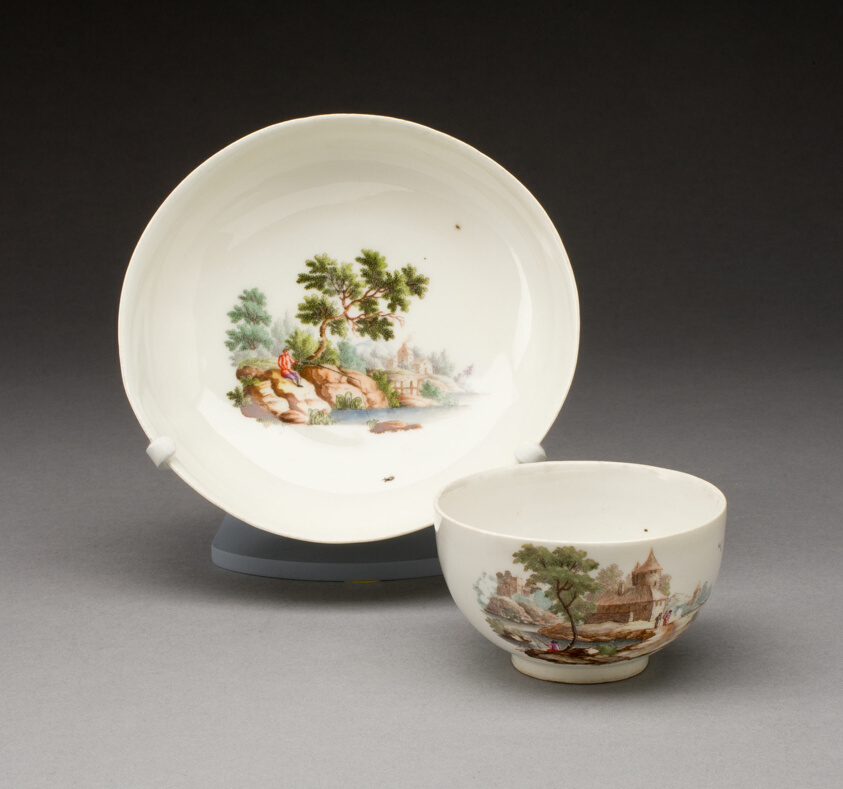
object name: Ceramics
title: Cup and Saucer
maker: Switzerland, Zürich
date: c. 1770/80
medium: Porcelain with polychrome enamel decoration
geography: Zürich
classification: drinking vessel; porcelain; european decorative arts; ceramics